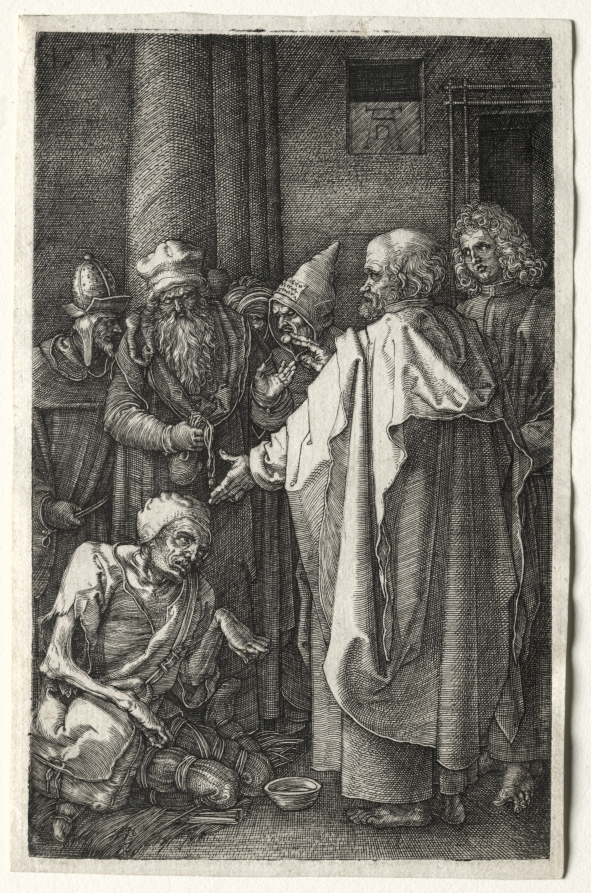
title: Peter and John Healing the Cripple at the Gate of the Temple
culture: Germany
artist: Albrecht Dürer (German, 1471–1528)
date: 1512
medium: engraving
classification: Print